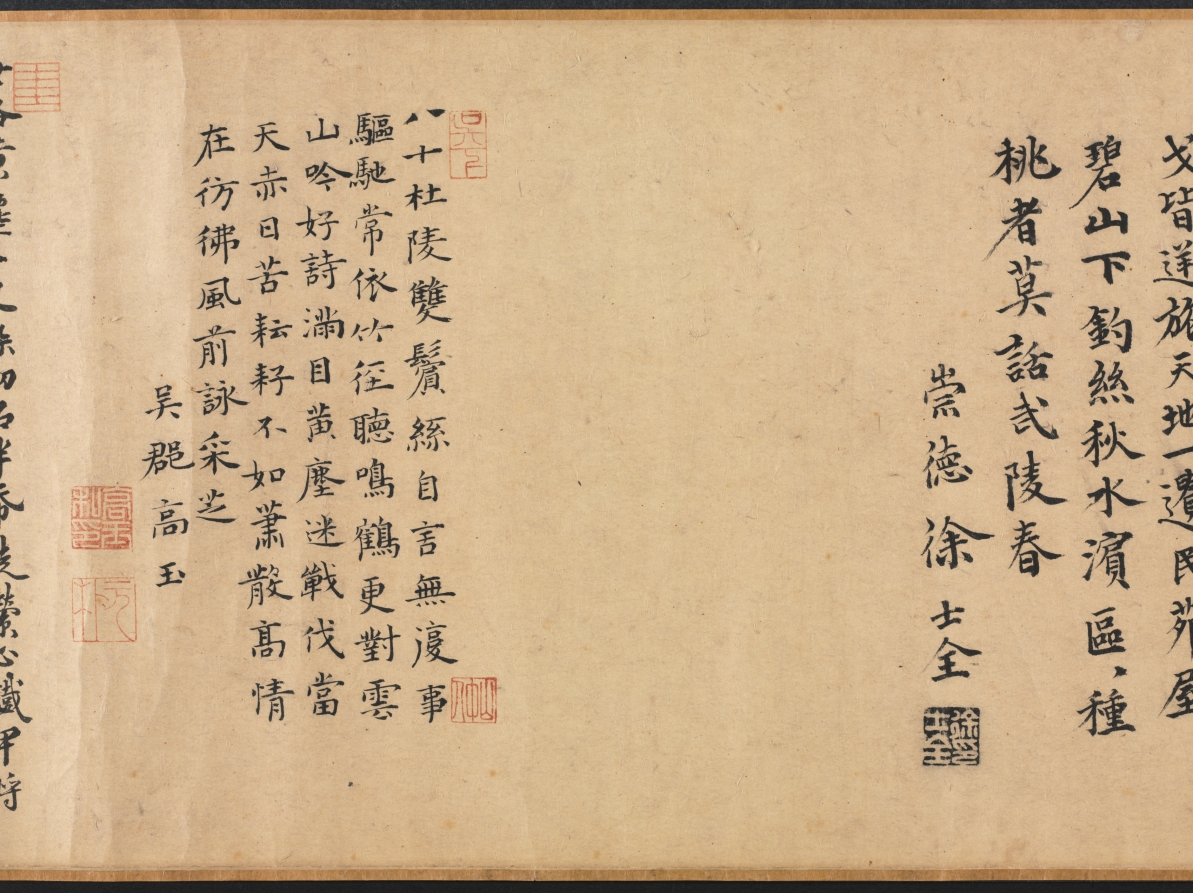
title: Leisure Enough to Spare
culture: China, Yuan dynasty (1271-1368)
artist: Yao Tingmei (Chinese, active mid-1300s)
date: 1360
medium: handscroll, ink on paper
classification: Painting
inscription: 至正廿年春正月_日作此併系鄙語于尾 地偏人遠閉柴關，滿院松陰白晝閒。 眼底風塵渾忘却，坐看流水臥看山。 吳興姚廷美畫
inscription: 23 colophons and 53 seals (dates unavailable for some): 1 colophon, dated 1360, and 2 seals of Yang Weizhen (1296-1370); 1 colophon and 3 seals of Wan Yi; 1 colophon of Zhang Junde; 1 colophon and 3 seals of Angji (act. ca. mid-14th c.); 1 colophon and 1 seal of Xu Shiquan; 1 colophon and 3 seals of Gao Yu; 1 colophon and 2 seals of Li Mingfu; 1 colophon and 2 seals of Lu Lin; 1 colophon and 1 seal of Zhang Qian; 1 colophon of Tao Tangwen; 1 colophon and 1 seal of Wu Yuangui (act. ca. 1300-60); 1 colophon of Bao Jiong; 1 colophon of Wang Zao; 1 colophon and 1 seal of Ma Chuyi; 1 colophon and 1 seal of Lin Yizhuang; 1 colophon and 1 seal of Gu Shunju; 1 colophon and 2 seals of Wang Jing; 1 colophon and 2 seals of Lin Shouchang; 1 colophon and 1 seal of Gao Zhidao; 1 colophon of Lin Xun; 1 colophon, dated 1359, and 2 seals of Meng Weicheng (act. mid-14th c.); 1 colophon and 1 seal of Meng Zhiji (act. mid-l4th c.); 14 seals of Liang Qingbiao 梁清標 (1620-1691); 1 poem dated 1755 and 5 seals of the Qianlong 乾隆 emperor (r. 1736-95); 2 seals of the Jiaqing 嘉慶 emperor (r. 1796-1821); 3 seals of the Xuantong 宣統 emperor (r. 1909-11).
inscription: Title on frontispiece by Zhang Bi 章弼: Signed Gongchen 拱辰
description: Seclusion and leisure—the ideals of the literati, or scholar-gentlemen—are expressed in this mature work by Yao Tingmei. The theme acquired special meaning at a time of the military uprisings near the end of the Yuan dynasty. Dedicated to an ascetic named Du, this work combines painting, calligraphy, and poetry; following the painting are more than 20 poems and essays written by notable scholars, one of whom was the calligrapher Yang Weizhen. It reveals not only the aesthetic taste of the literati but also the practice of contributing artistic and literary works to fulfill social obligations. Yao's painting demonstrates his individual style derived from various ancient masters (Guo Xi, Dong Yuan, and Juran). Yang Weizhen's calligraphy exhibits his bold, vigorous style and his intent to capture the spirit of antiquity in art.